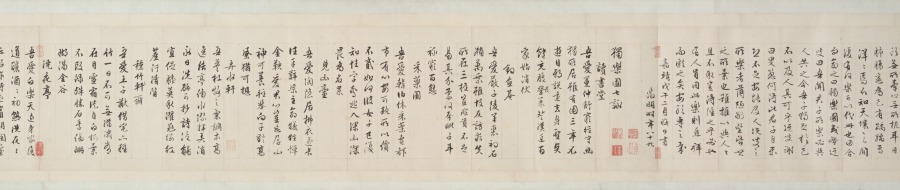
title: Garden for Solitary Enjoyment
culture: China, Ming dynasty (1368–1644)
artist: Qiu Ying (Chinese, 1494–1552)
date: 1515–52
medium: Handscroll; ink and light color on silk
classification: Painting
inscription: Accompanying text of an essay together with seven poems of Sima Guang (1019–1086) and one poem of Su Shi (1037–1101) written by Wen Zhengming (1470–1559) in 1558.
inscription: 2 colophons and 82 seals: 4 seals of Wen Zhengming 文徵明 (1470–1559); 59 seals of Xiang Yuanbian 項元汴 (1525–1590); 1 colophon, dated 1644, and 7 seals of Xiang Yukui 項禹揆 (c. late 1500s–1659); 1 colophon, dated 1880, and 2 seals of Weng Tonghe 翁同龢 (1830–1904); 2 seals of Ch'eng Chen-i (19th c.); 1 seal of Han Ch'ung (19th c.); 4 seals of Wan-go H. C. Weng 翁萬戈 (1918–2020); 3 seals unidentified.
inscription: Colophon by Xiang Yukui 項禹揆 (c. late 1500s–1659): The painting of The Garden for Self-enjoyment on the right by Shih-chou, Mr. Qiu [Qiu Ying] is in the style of Li Lung-mien. Its mood is peaceful, as if meeting the ancient gentlemen face to face among the brushes and silk; it lifts one above the sordid bustle of life. Formerly, my late father handed me this scroll which had only the painting without the written essay. I considered asking a good calligrapher to write the essay to add to it but was afraid that the quality of the writing would not match the painting. Several years later, I saw at a friend's house this essay and poems (of Ssu-ma Kuang] written by Hengshan [Wen Zhengming], once owned by my grandfather; so I spared no expense to obtain it. I rejoiced at this and said: "The divine swords are finally united. How things are pre-destined!" Now my friend Chang Kung-chao's technique for mounting [painting and calligraphy] is excellent. Therefore by daring to take them out and join them together, I can preserve this beautiful story of singular reunion. Xiang Yukui recorded at Hai-yeh-t'ang [hall] two days before New Year's Eve in the jiasheng year of the Chongzhen era [1644]. trans. LYSL/HK/WKH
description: Garden of Solitary Enjoyment refers to a site built in 1073 by the statesman Sima Guang (1019–1086) after he had retired to Luoyang, Henan province. Every spring, visitors would flock to his garden. Each of its seven structures references a historic figure. Sima wrote: I channel streams [like Du Mu], to water flowers [like Bai Juyi], or trim bamboo [like Wang Huizhi]. . . . I know of no joy between heaven and earth that could take its place. Qiu Ying’s painting, created after an 11th-century version of the same theme, must have appealed to garden owners of the Ming dynasty, since it became the template for numerous Suzhou workshop copies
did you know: Sima Guang completed his monumental survey of Chinese history, Zizhi tongjian, in the garden depicted in this painting.